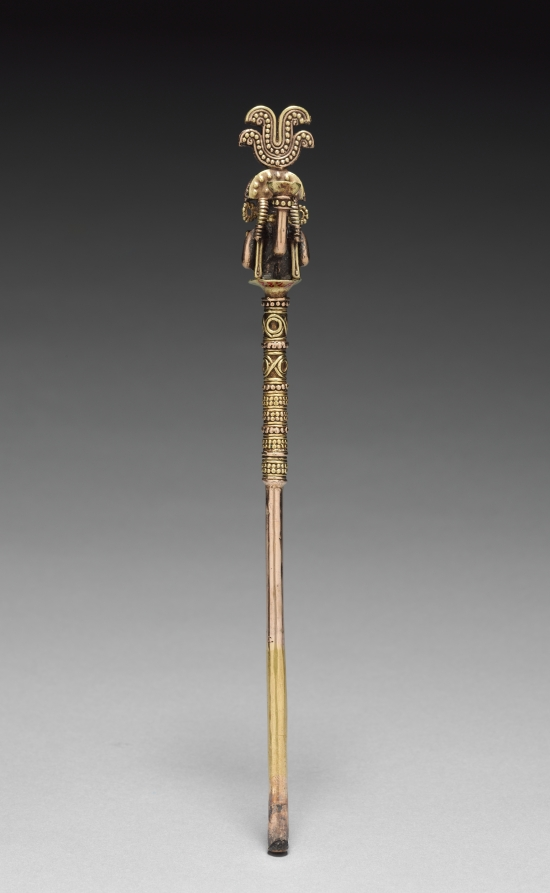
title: Lime Dipper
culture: Colombia, Calima region, Yotoco style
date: c. 1–800 CE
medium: gold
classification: Metalwork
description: Coca-leaf chewing was a widespread ritual in ancient South America. Utensils included a container and a dipper or spoon for powdered lime (made from seashells), added to the coca to enhance its gentle, stimulating effect. Colombian cultures are especially known for transforming these utensils into works of art made of precious metal. The image on the tallest dipper is wonderfully complex. A serpent coils at the bottom, beneath a snarling animal with a huge, vertical tail. This animal has a tiny monkey on its back; the monkey also has a huge tail, which rests on the first animal's head like a headdress. This intricate image was created with the lost-wax casting process.